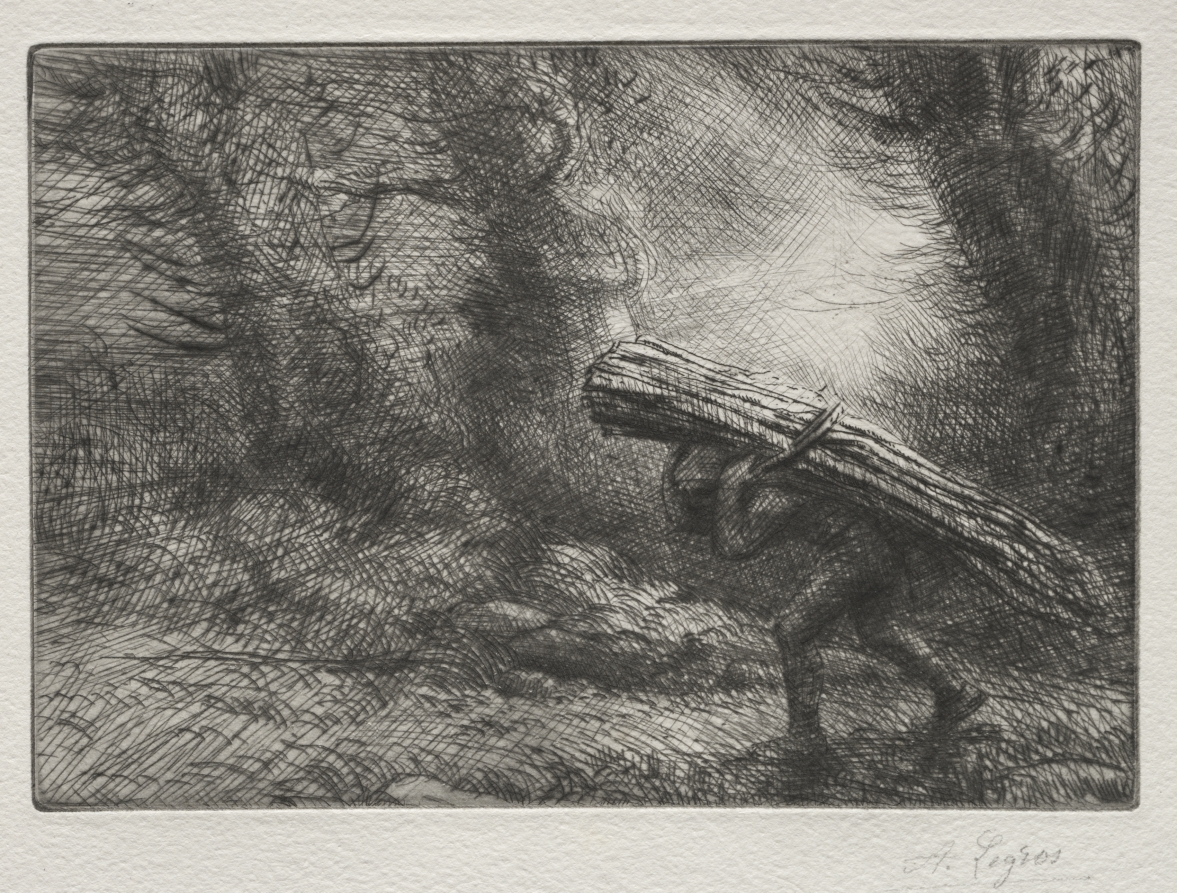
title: The Return to the Cottage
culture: France, 19th century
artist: Alphonse Legros (French, 1837–1911)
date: c. 1857–1911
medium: drypoint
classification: Print